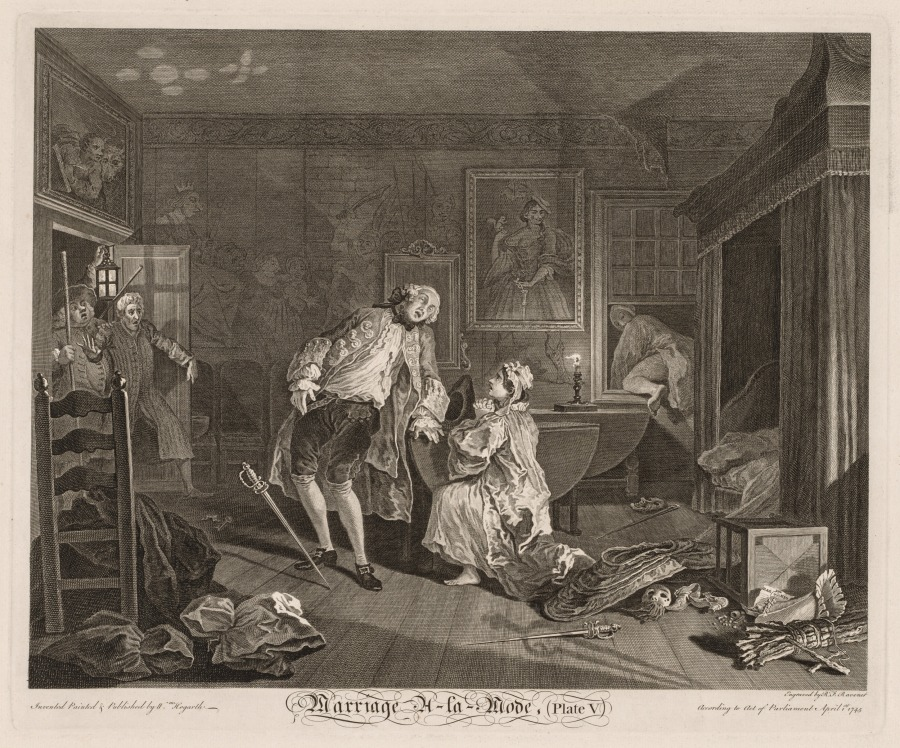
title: Marriage à la Mode: The Death of the Earl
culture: England, 18th century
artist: William Hogarth (British, 1697–1764)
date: 1745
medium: engraving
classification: Portfolio